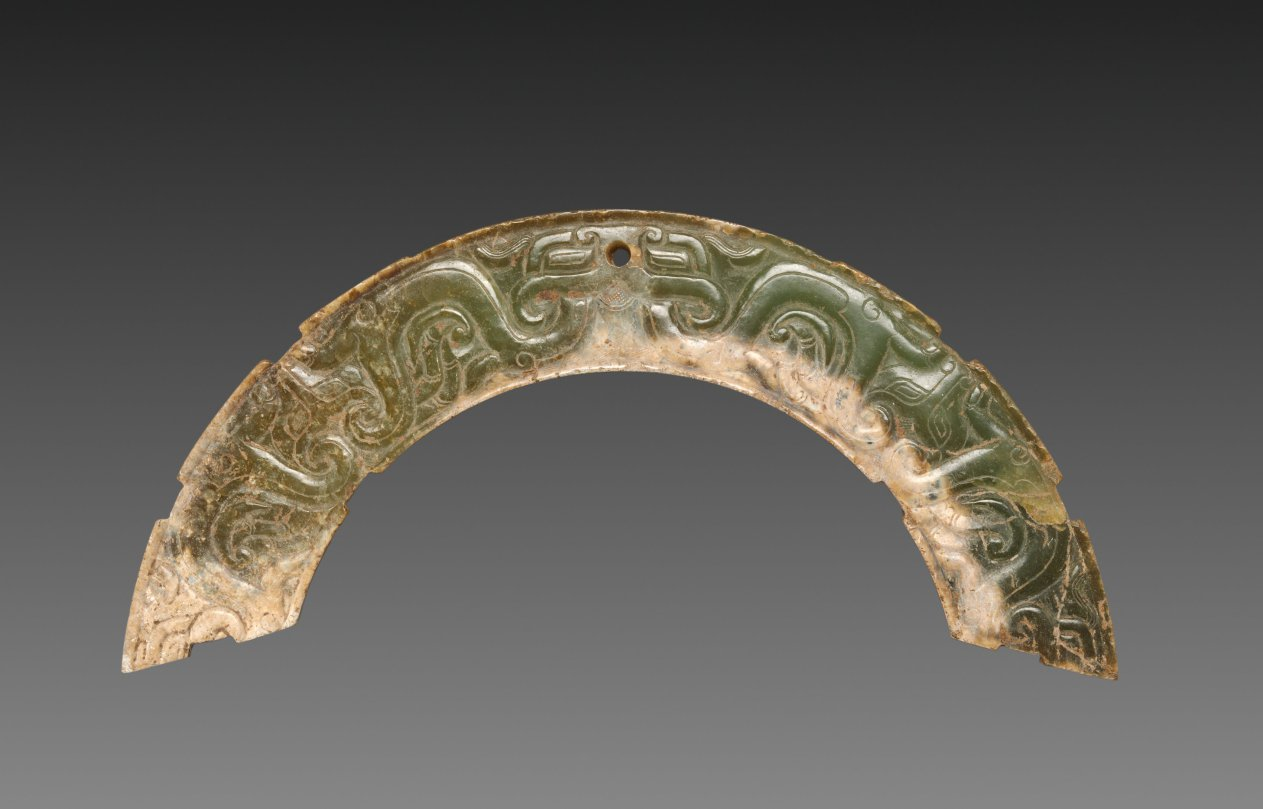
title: Arc-shaped Pendant with Animal Mask and Interlaced Animal Bands (Huang)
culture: China, Warring States period (475–221 BCE) to Western Han dynasty (206 BCE–8 CE)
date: 300–100 BCE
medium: nephrite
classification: Jade